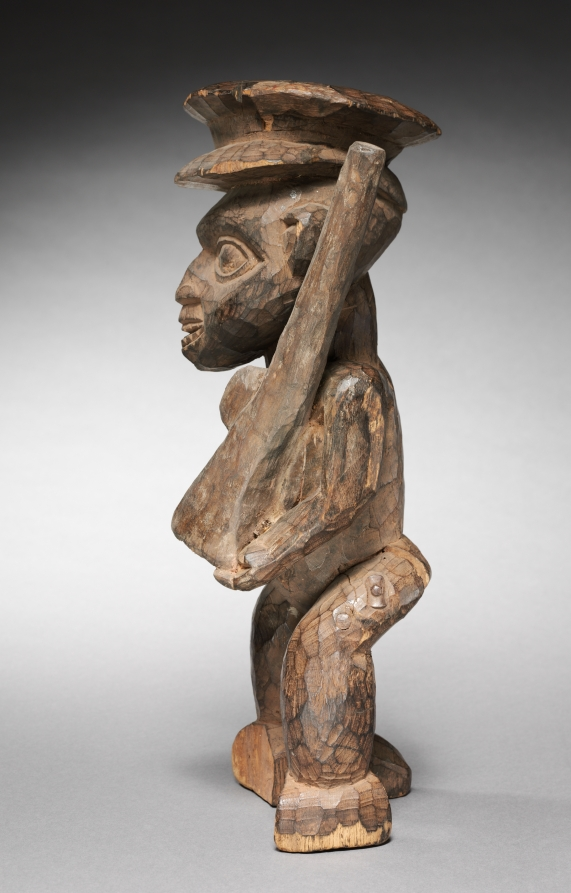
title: Male Figure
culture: Africa, Central Africa, Cameroon, Grassfields region, unidentified maker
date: c. 1905–10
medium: wood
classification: Sculpture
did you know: The weapon this figure holds is a later replacement added in Ohio.